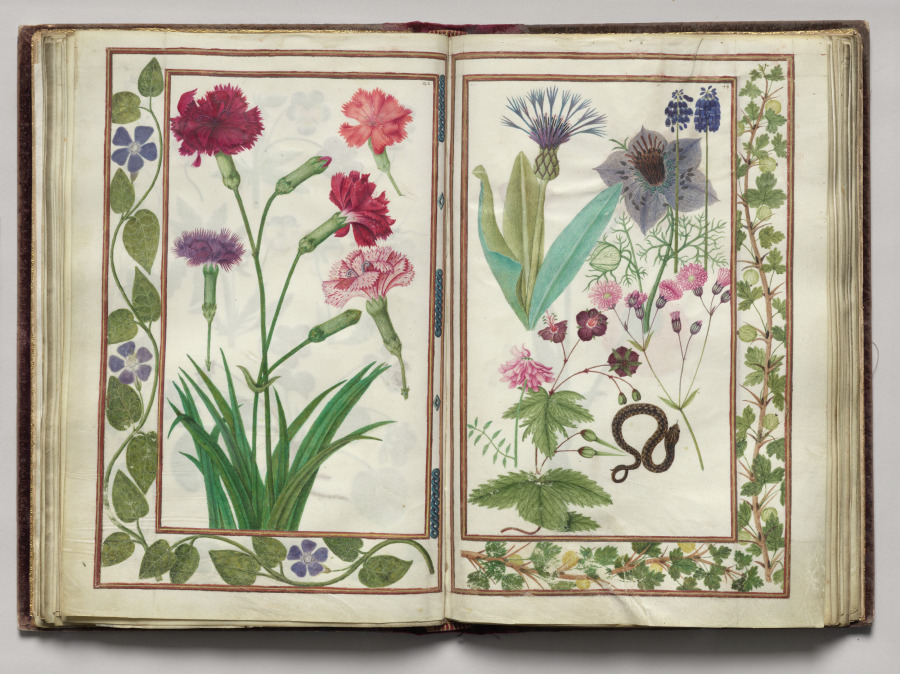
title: Blue Cynthia, Nigella, Gray Pyensin, Cranesbill, and Snake with Gooseberry Border, folio 22 (recto), from Florilegium (A Book of Flower Studies)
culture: France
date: 1608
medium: watercolor, ink, silver, and gold over occasional traces of pencil, on vellum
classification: Bound Volume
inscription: Dated: Poitiers 1608 (on frontispiece) Signed: On frontispiece in black ink, lower right: Van Kuyk Notation on drawing: Frontispiece: in pencil, lower margin: * élève de Van Kessel, peintre flammand (* in pencil also appears in front of Van Kuyk's name).